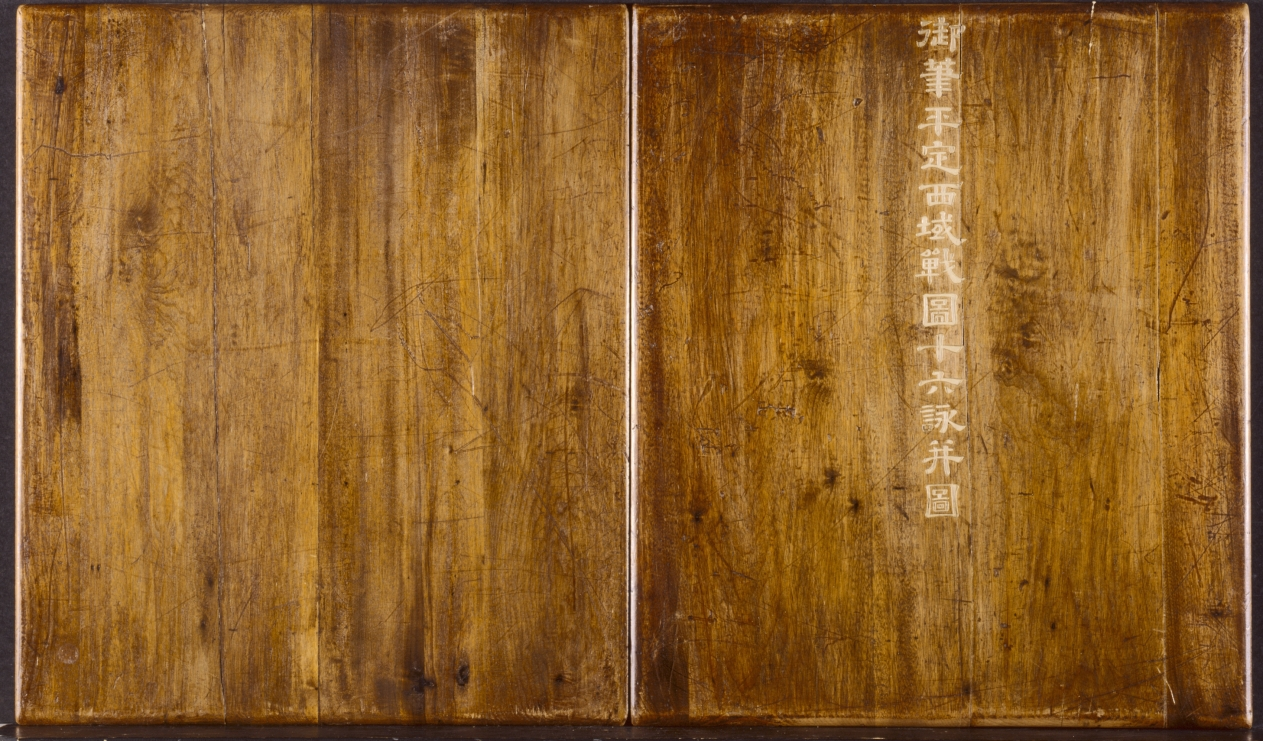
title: Battle Scenes of the Quelling of Rebellions in the Western Regions, with Imperial Poems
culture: China, Qing dynasty (1644–1911), Qianlong reign (1736–95)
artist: Giuseppe Castiglione (Italian, 1688–1766)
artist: Jean Damascene Sallusti (Italian, d. 1781)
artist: Jean Denis Attiret (French, 1702–1768)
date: c. 1765–74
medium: Etchings, mounted in album form, 16 leaves plus two additional leaves of inscriptions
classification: Print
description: This set of etchings was commissioned by Emperor Qianlong to record in pictorial terms the courage of his generals and soldiers in quelling the rebellions in the Western Regions. Qianlong added his own poem to each of the etchings, indicating his appreciation and pride in this demonstration of military might. "Western Regions" refers to the present-day Xingjiang province, often described in Western writing as "Central Asia."